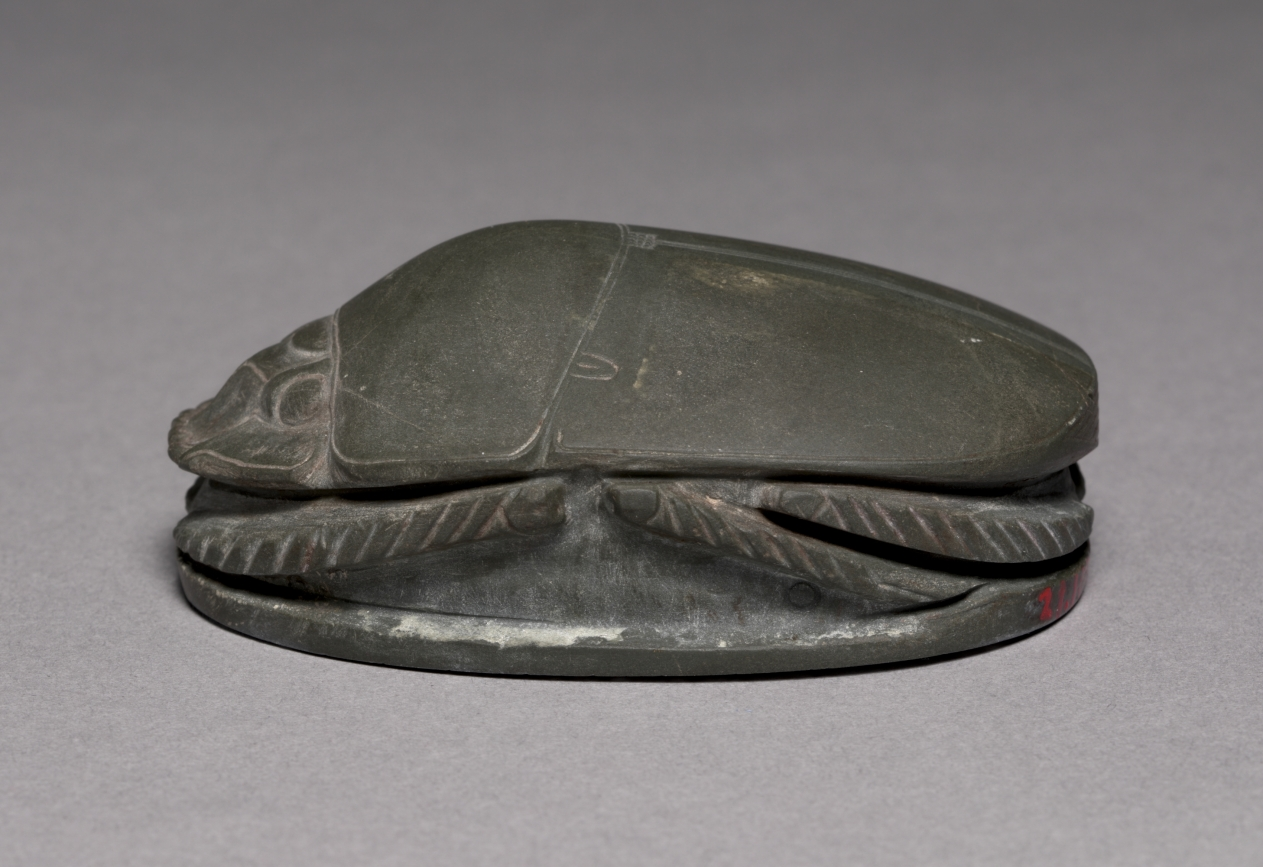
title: Heart Scarab of Nefer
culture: Egypt, New Kingdom (1540–1069 BCE), Dynasty 18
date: 1540–1296 BCE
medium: graywacke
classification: Scarabs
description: The design features in these objects borrow various ancient Egyptian funerary elements. The scale illustrated on top of the Cartier vanity case refers to the scale used in Osiris’s final judgment of the deceased. Amulets like the heart scarab were essential to the mummification process. They were placed throughout the mummy’s wrappings to protect the deceased during their journey in the afterlife. These inspired the Dior brooch seen on the model here. The ancient Egyptians believed amulets carried spells and that some, like the heart scarab, could sway opinions during the final judgement to help the deceased get to their version of heaven, called Iaru.